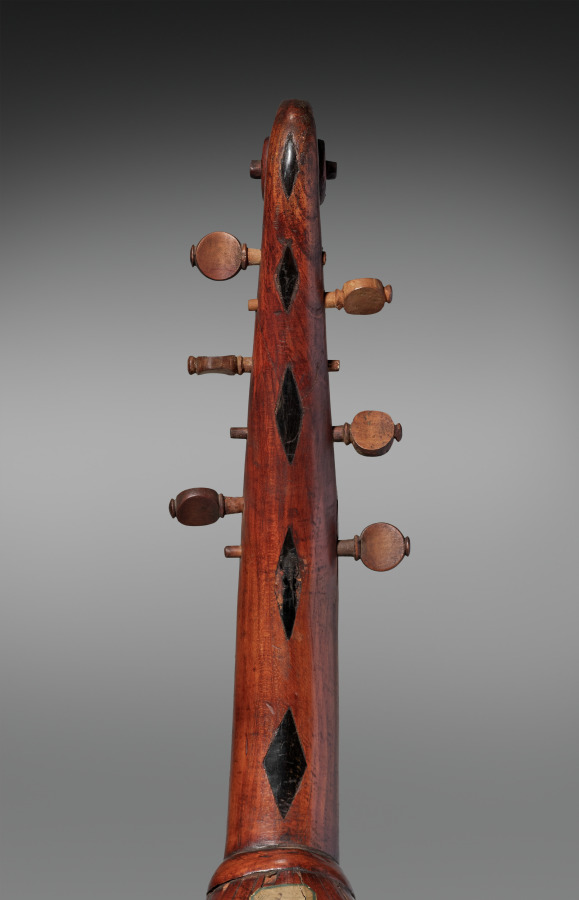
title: Pandurina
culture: Italy, 15th century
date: 1400s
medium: varnished wood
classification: Musical Instrument